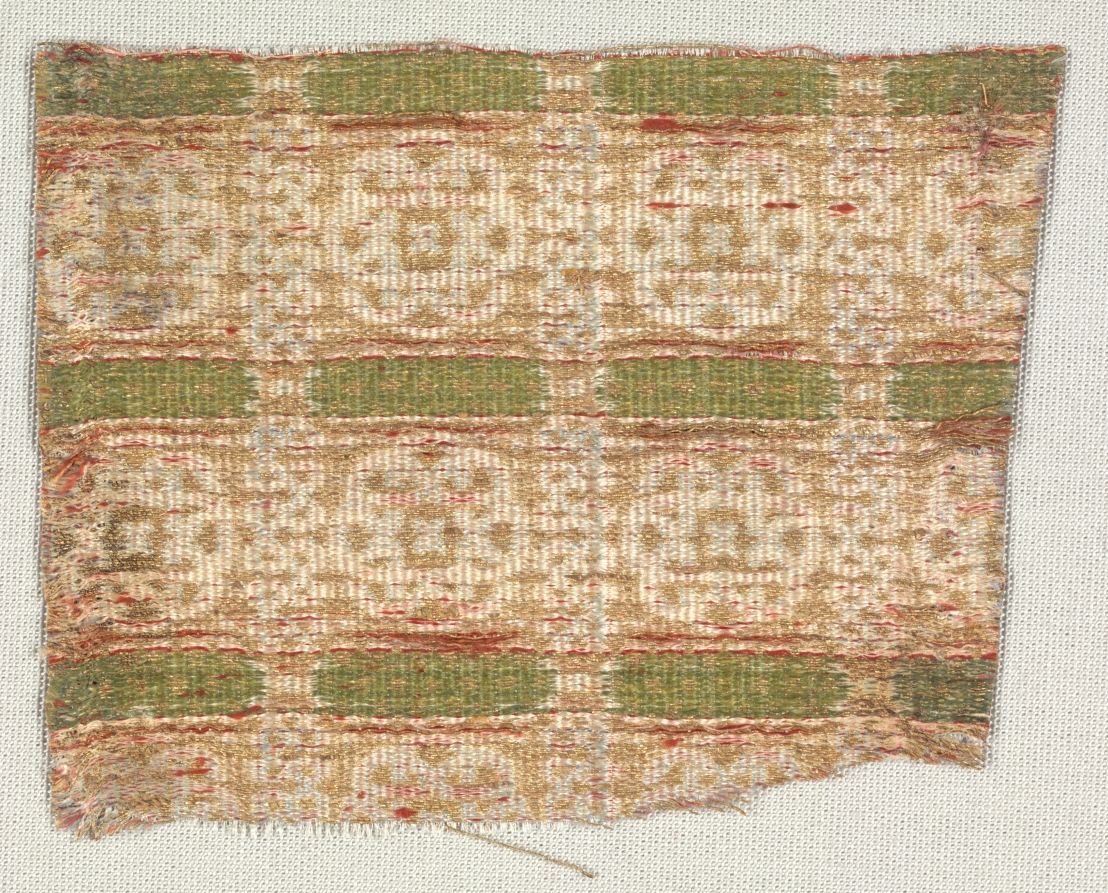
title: Fragment with stars in stacked squares, from a dalmatic of San Valero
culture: Spain, probably Almeria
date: 1200s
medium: lampas with areas of double cloth: silk and gold thread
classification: Textile